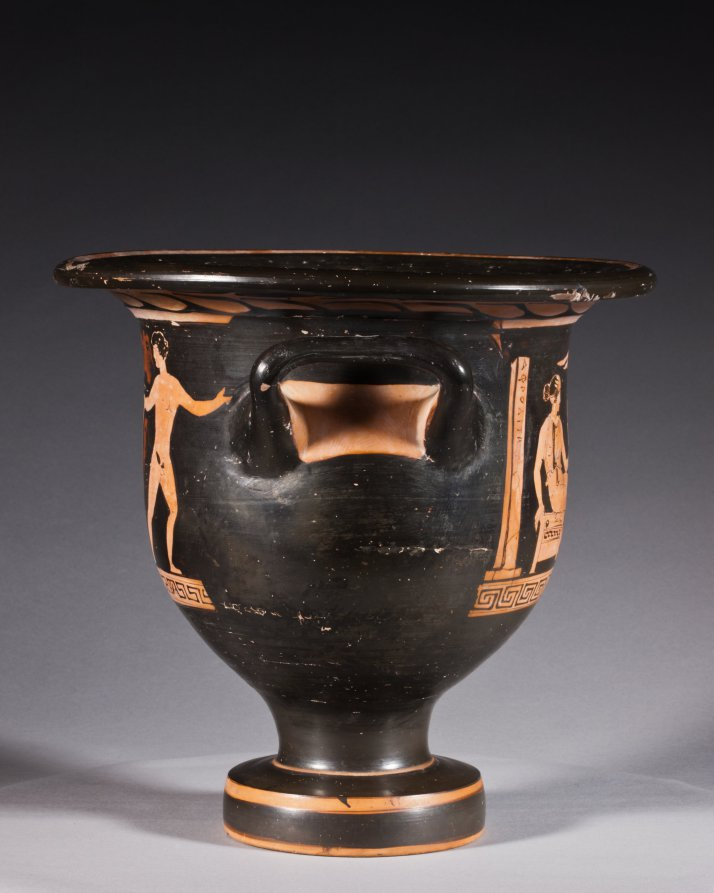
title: Red-Figure Bell Krater (Mixing Vessel): Aphrodite and Eros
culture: South Italian, Apulian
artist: attributed to Graz Painter (South Italian, Apulian, active c. 380–360 BCE)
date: c. 370–360 BCE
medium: ceramic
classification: Ceramic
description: This small mixing vessel shows a finely dressed woman seated on a chest and holding up a mirror to admire herself. Before her stands Eros, the winged god of love, holding a ribbon or sash. Behind the woman stands a pillar with the inscription ΑΦΡΟΔΙΤΗ, or APHRODITE, the goddess of love. Such labels are rare on vases, and scholars debate whether this names the woman shown as Aphrodite herself, with her son Eros, or a bride envisioning herself as Aphrodite, just before her wedding.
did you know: The dancing nude youths on the reverse are unusual; typically they would be standing and draped.